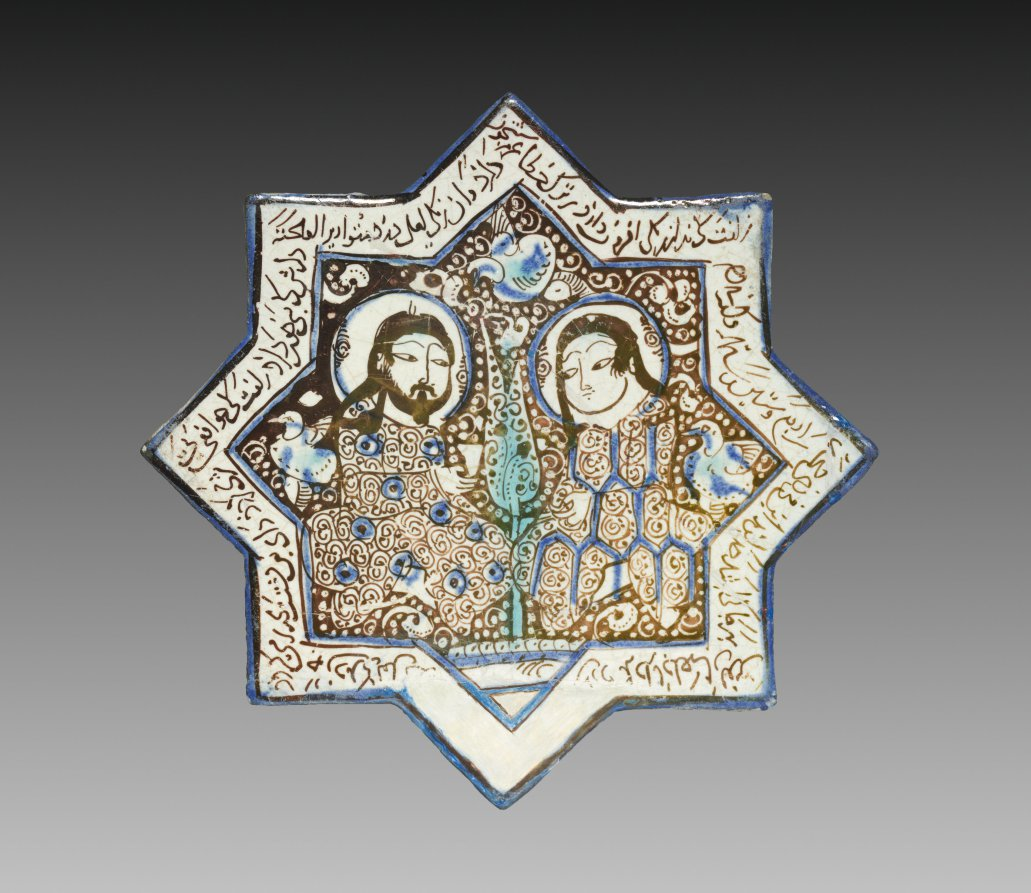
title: Luster Wall Tile with a Couple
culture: Iran, Kashan, Ilkhanid period (1256-1353)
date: 1266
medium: fritware with luster-painted design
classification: Ceramic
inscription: Top reading R to L: (1) Rubāʿī: TEXT: zulfat ki hizār zangī afzūn dārad——————bar turk-i khitā ʿazm-i shabīkhūn dārad v'ān zangī laʿl duzd-i mutvāri-rā——————āvikht-i dār ki basi khūn dārad. TRANSLATION: Your tresses, which possess over a thousand Zangis (Zanjis, black slave-soldiers, i.e. more than a thousand strands of hair) Are bent on a surprise night time charge against the Cathay Turks (handsome slave-soldier boys redolent of musk) And (as for) that ruby stealing (disheveled) Zangi in hiding Have him hanged for he has plenty of blood on his hands. (2) Rubāʿī: these verses start immediately after the last verses, on the left hand side going down: TEXT: zulfat ki chu afʿī pay-i sharr mi-gardad———dāni pas-i pushtat bi-chi bar migardad chun dīd ki laʿl to [zumurrud bigrift————vahshī shud u bar kuh u kamar migardad.] TRANSLATION: Your hair (tresses), which viper-like is bent on mischief, do you know why it returns behind your back? When it saw that your ruby (lips) has (now) an emerald (down appearing above the lips), it became wild (lost all senses) and wanders on the mountain side.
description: The design of this tile-a couple with a wine beaker surrounded by verses of Iranian love poetry-indicates that it was originally part of wall decoration and would have alternated with cross-shaped tiles.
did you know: Where fine clay was unavailable, potters made a paste out of ground quartz, clay, and glass. When fired, the paste created a compact white material called fritware that approximated the appearance of porcelain.